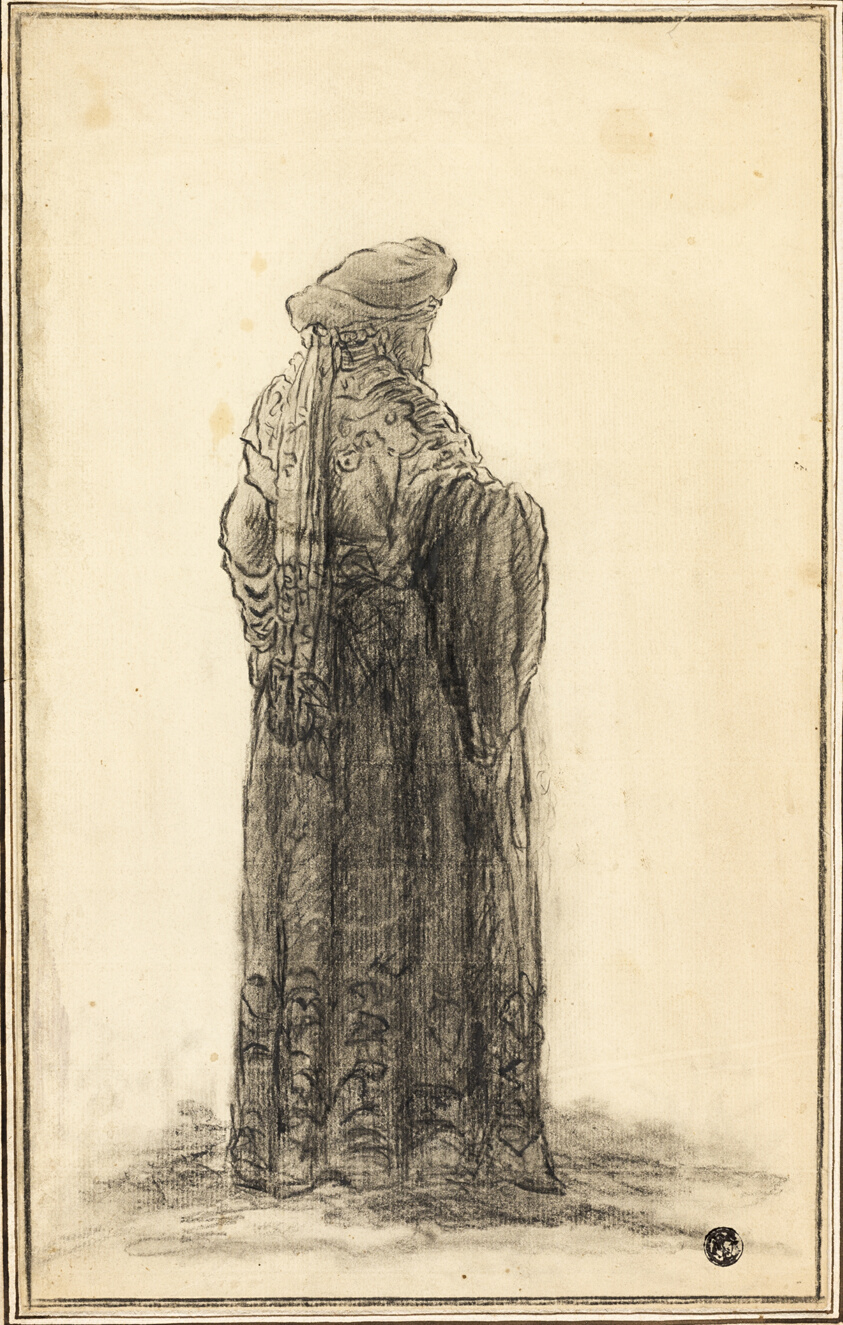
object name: Drawing and Watercolor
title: Jewish High Priest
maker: Adam Sandor Ehrenreich (Hungarian, 1784-c.1840)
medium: Black chalk and crayon, on cream laid paper, tipped on ivory laid paper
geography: Hungary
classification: charcoal; drawings (visual works); prints and drawing